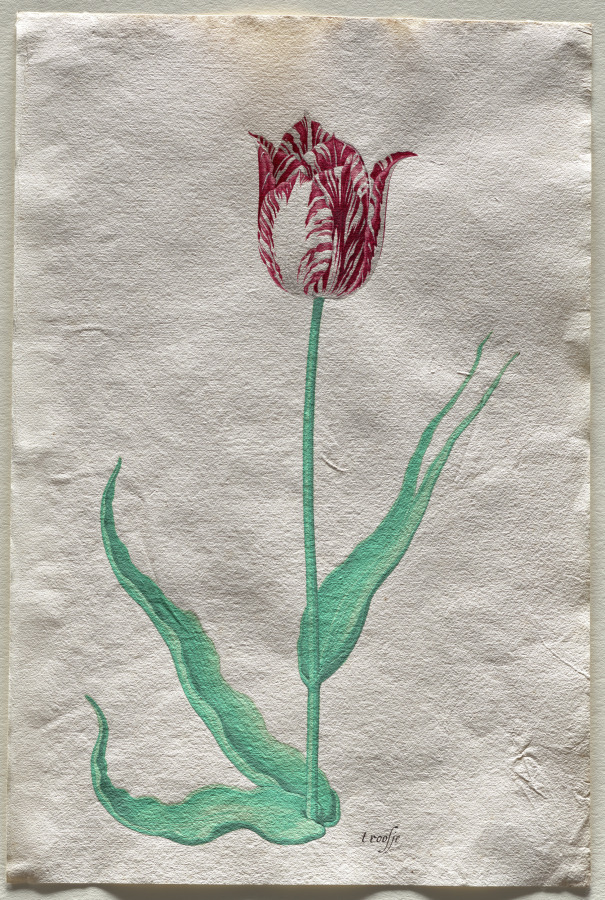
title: Study of a Tulip ('t roosje)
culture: Netherlands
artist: Pieter Holsteyn II (Dutch, c.1612–1673)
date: c. 1645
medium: Point of brush and transparent and opaque watercolors with traces of graphite and gum glazing on antique laid paper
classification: Drawing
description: This image of a tulip was made as part of a tulip book used as a grower’s marketing tool during the so-called tulip mania, a speculative bubble in 17th-century Holland, when ten tulip bulbs could cost more than a stately Amsterdam canal house. The striations on the tulip, which were caused by a virus in the bulb, made it especially valuable. Pieter Holsteyn II was one of many artists in the Netherlands at the time who specialized in botanical illustration. This tulip's Dutch name, inscribed on the sheet, means "trumpet."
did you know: In 17th-century Holland, some tulip bulbs were as expensive as a stately Amsterdam canal house.